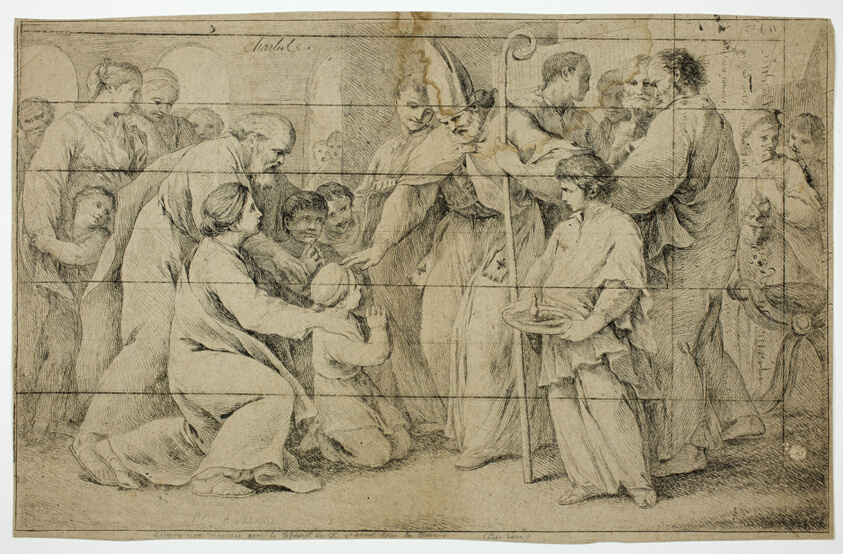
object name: Print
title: The Confirmation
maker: Pierre Charles Trémolières (French, 1703-1739)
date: c. 1730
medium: Etching in brown on tan laid paper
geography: France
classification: etching; print; prints and drawing